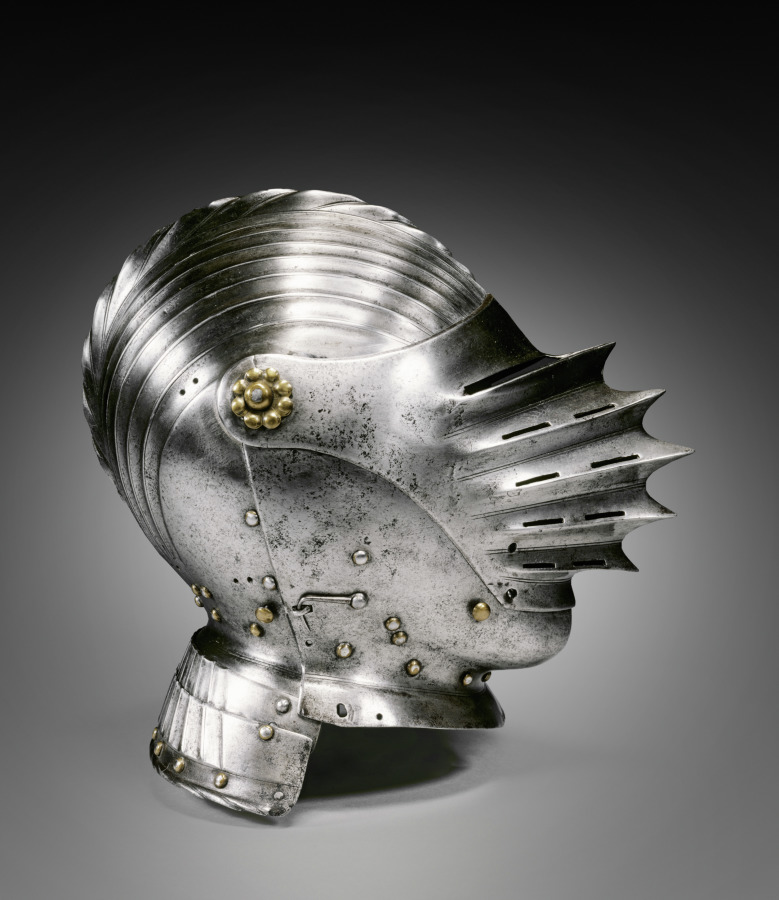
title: Close Helmet in Maximilian Style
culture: Germany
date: c. 1520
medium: steel and brass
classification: Arms and Armor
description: The regular fluting of this helmet is a style known as "Maximilian," named after Maximilian I, Holy Roman Emperor (1493–1519). Besides being decorative the fluting is a strengthening device that works similar to corrugated metal. This decoration would have been costly as it was time consuming to produce and required precise work. It would have only been available to the wealthiest of clients.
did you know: Known as the "Last Knight," Maximilian played a prominent role in this history of armor by building up the armament industry and fostering the modernization of the armorer's craft.